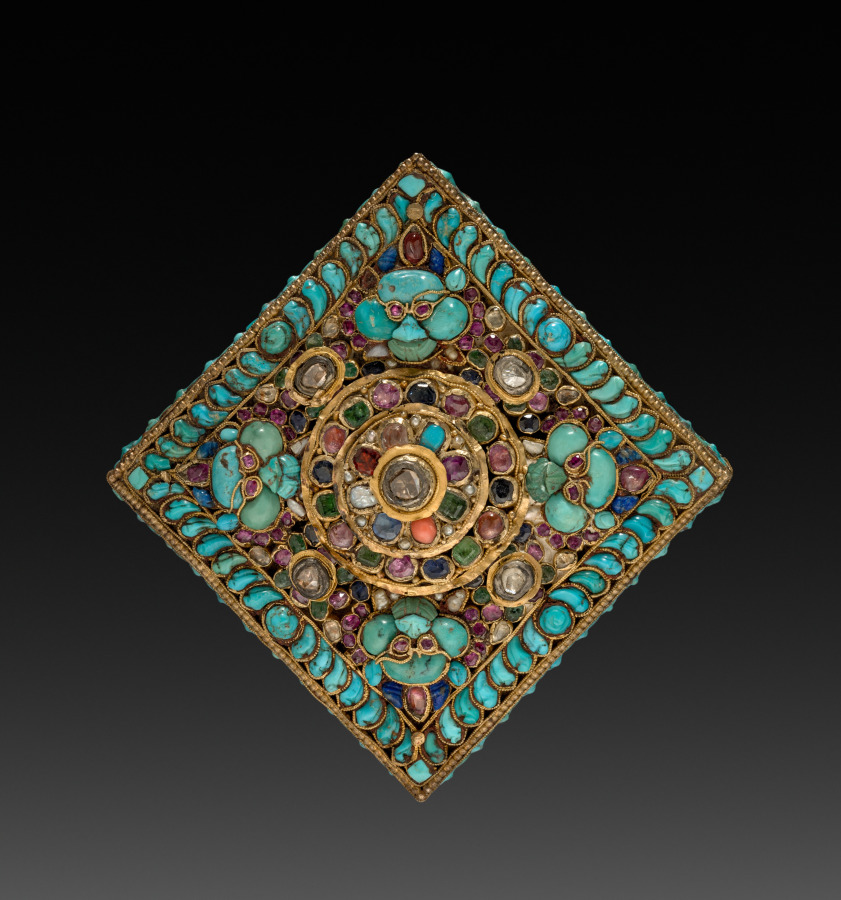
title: Charm Case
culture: Tibet, 19th century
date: 1800s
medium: gold with jewels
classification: Jewelry